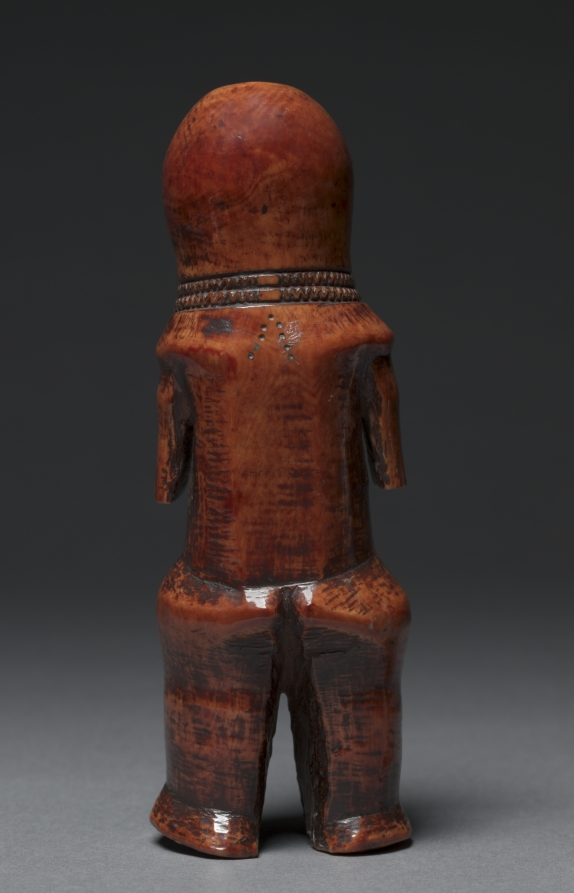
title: Figure (iginga)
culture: Africa, Central Africa, Democratic Republic of Congo, Lega-style maker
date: probably 1800s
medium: Elephant ivory, tukula, and oil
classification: Sculpture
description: The life of Lega men and women is structured around their advancement through the different grades of the Bwami association. Fulfilling political, social, religious, and other roles, the members’ ultimate purpose is the pursuit of wisdom and excellence. Ivory figurines were reserved for members of the two highest Bwami grades, in which the core of the Lega’s moral philosophy is revealed.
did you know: The dark surface (patina) of this sculpture comes from years of handling and the application of oil and a red powder called tukula; it was originally cream-colored!